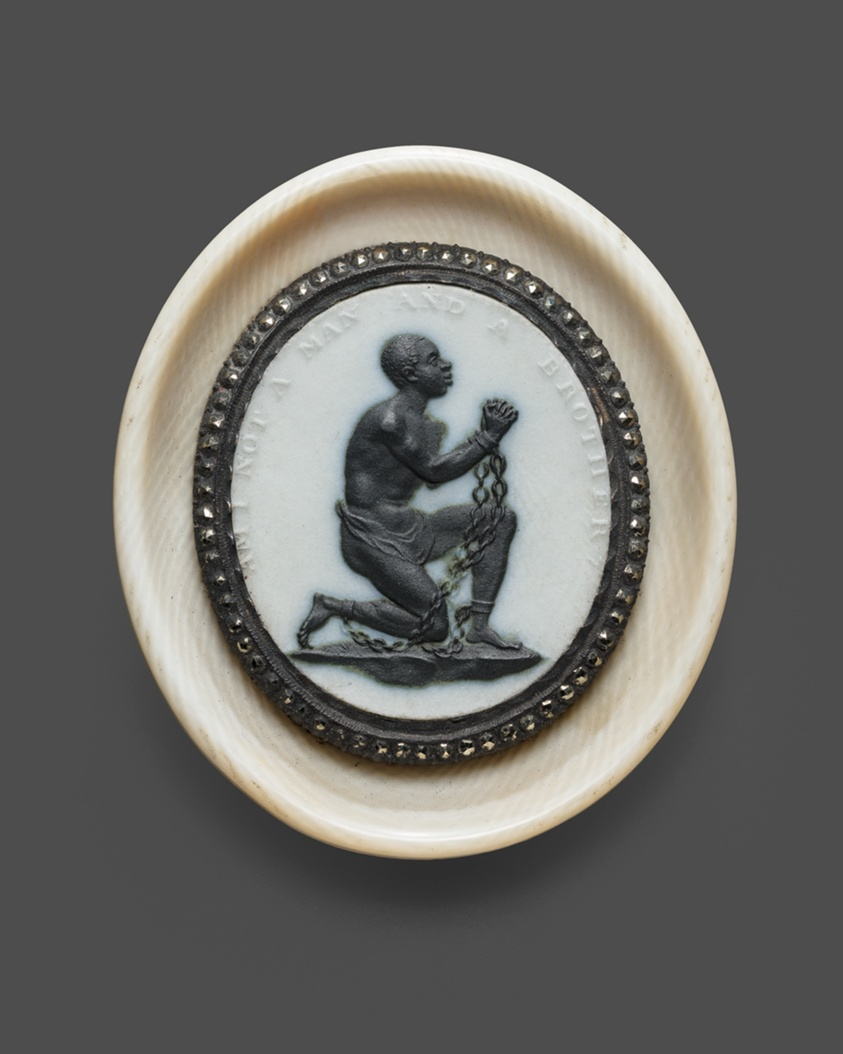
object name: Ceramics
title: Anti-Slavery Medallion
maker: Wedgwood Manufactory; England, founded 1759; Modeled by William Hackwood; English, c. 1753–1836; Etruria, Staffordshire, England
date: 1787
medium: Stoneware (jasperware and black basalt), cut steel, and ivory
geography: Burslem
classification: accessories (object genre); stoneware; european decorative arts; ceramics